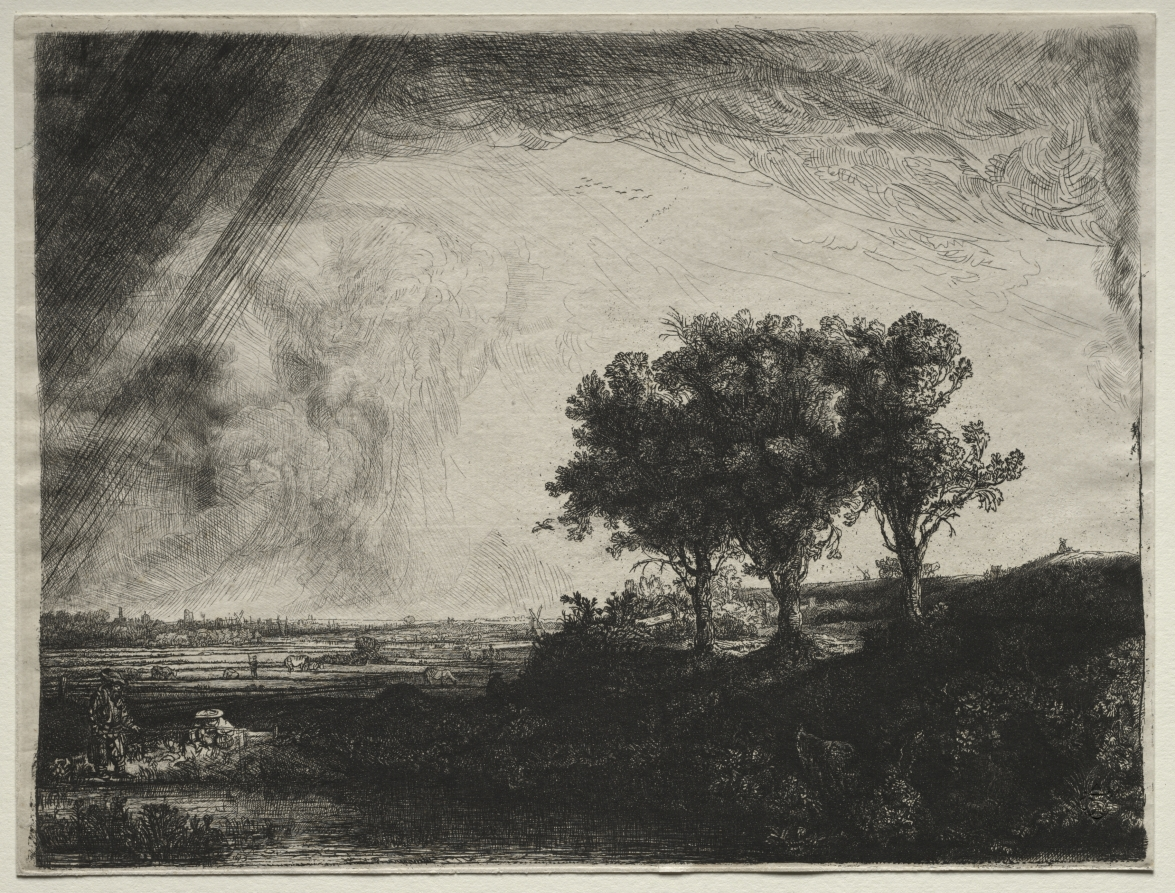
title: The Three Trees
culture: England, 18th century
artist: James Bretherton (British, 1844)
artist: copy after Rembrandt van Rijn (Dutch, 1606–1669)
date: c. 1770–1844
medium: etching and drypoint with roulette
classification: Print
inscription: VERSO, lower left, in graphite: Copy[underlined] for F.K.